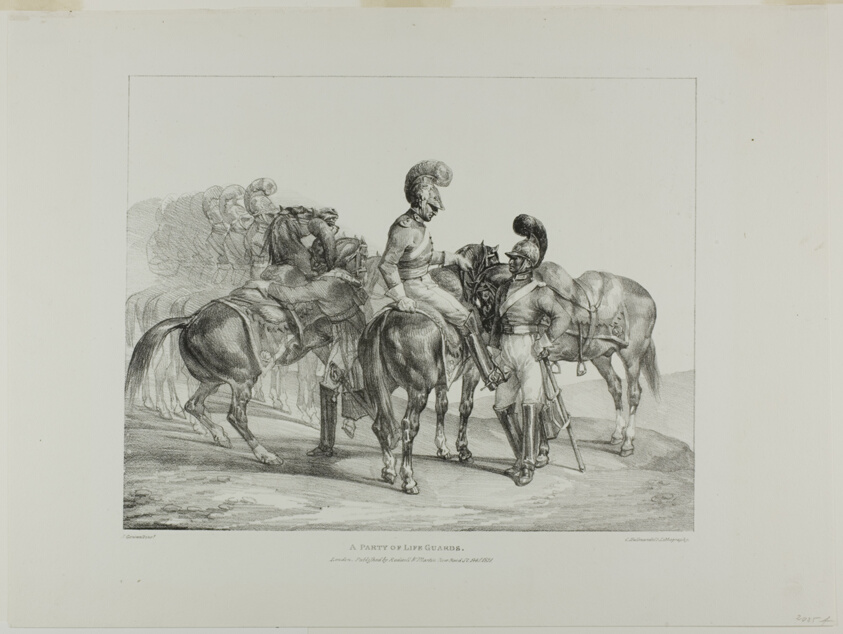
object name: Print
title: A Party of Life Guards, plate 5 from Various Subjects Drawn from Life and on Stone (The English Suite)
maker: Jean Louis André Théodore Géricault (French, 1791-1824); printed by Charles Joseph Hullmandel (German and English, 1789-1850); published by Rodwell and Martin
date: February 1821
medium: Lithograph in black on ivory wove paper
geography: France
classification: lithograph; print; prints and drawing